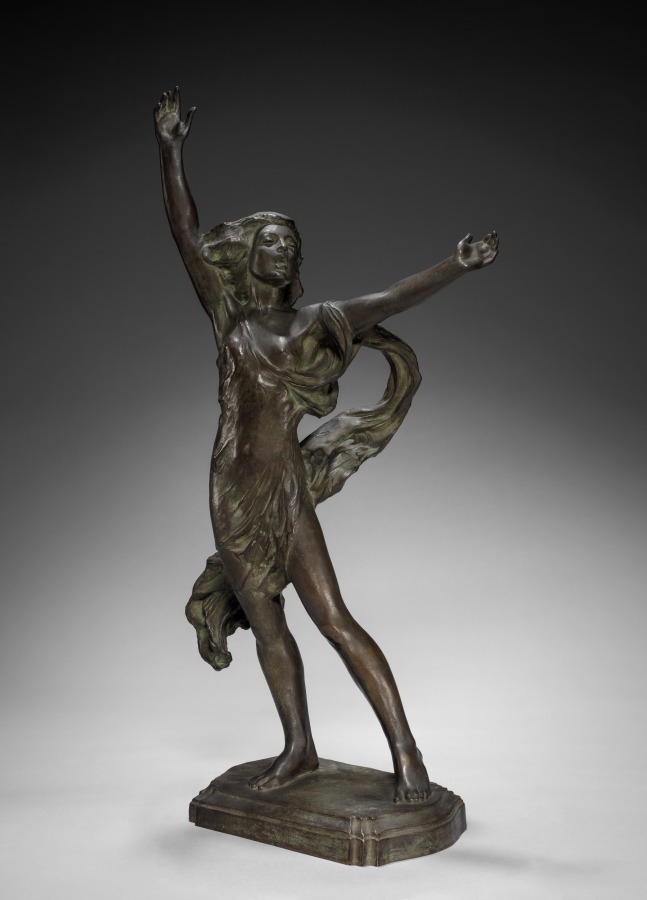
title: Pippa Passes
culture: America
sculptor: Louise Allen (American, 1880–1953)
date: c. 1916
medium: bronze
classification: Sculpture